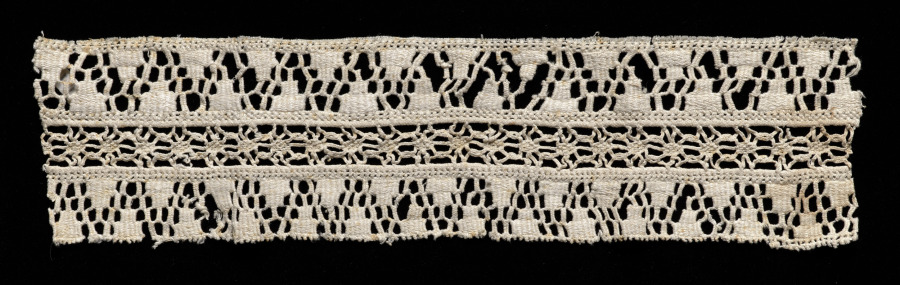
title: Lace fragment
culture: Italy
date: 1500s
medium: Needle lace (drawnwork) and bobbin lace insertion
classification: Lace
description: In this fragment, the band of bobbin lace is in the center, between two bands of drawnwork.